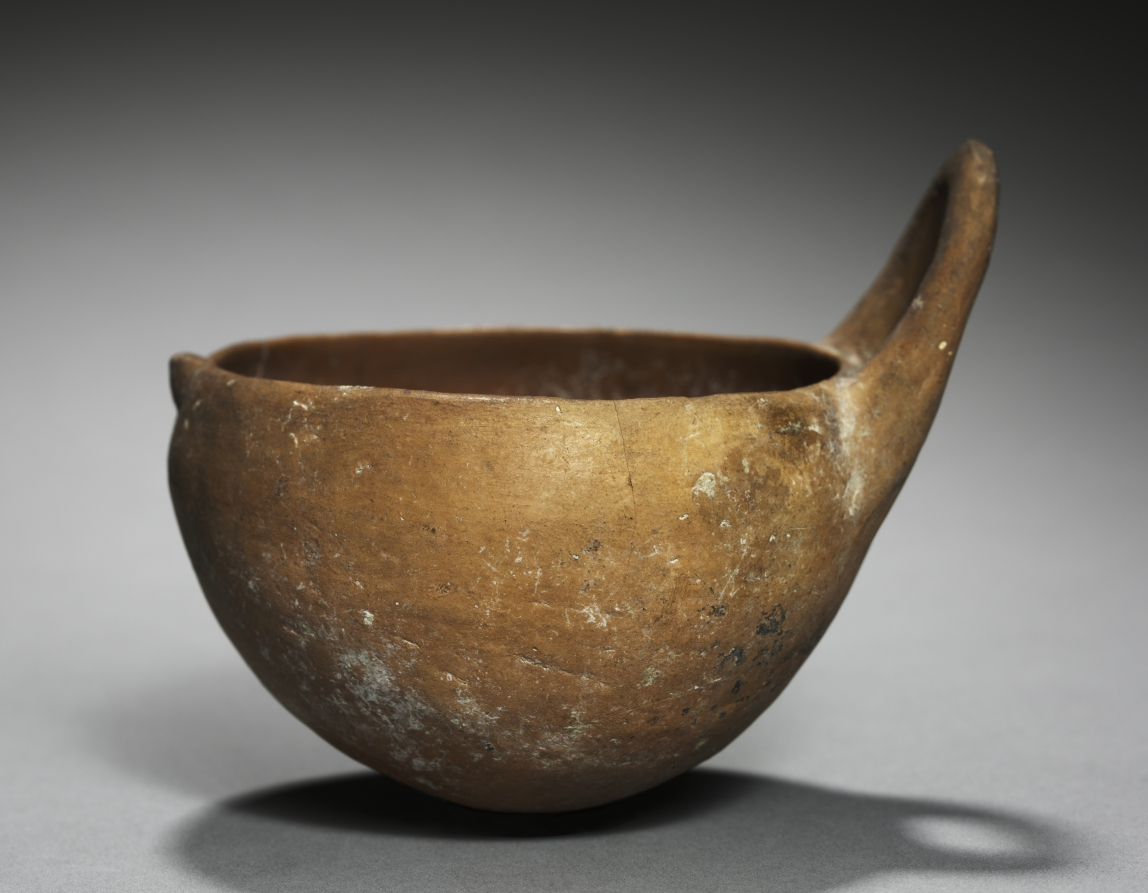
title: One-Handled Bowl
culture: Cyprus, early Cypriot III-middle Cypriot II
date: c. 2000–1725 BCE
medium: red ware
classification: Ceramic